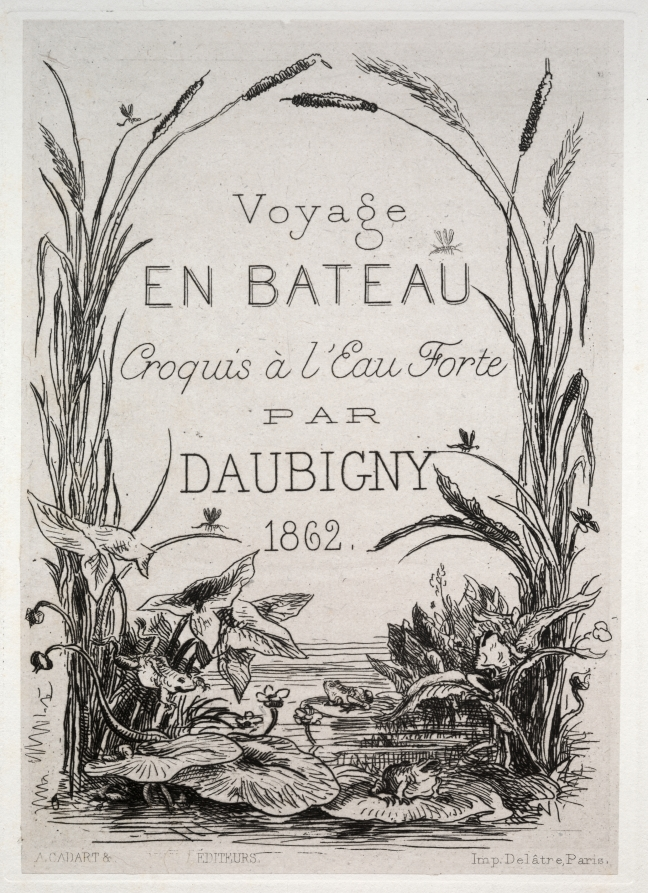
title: The Boat Trip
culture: France, 19th century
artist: Charles François Daubigny (French, 1817–1878)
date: 1861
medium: 16 etchings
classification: Portfolio